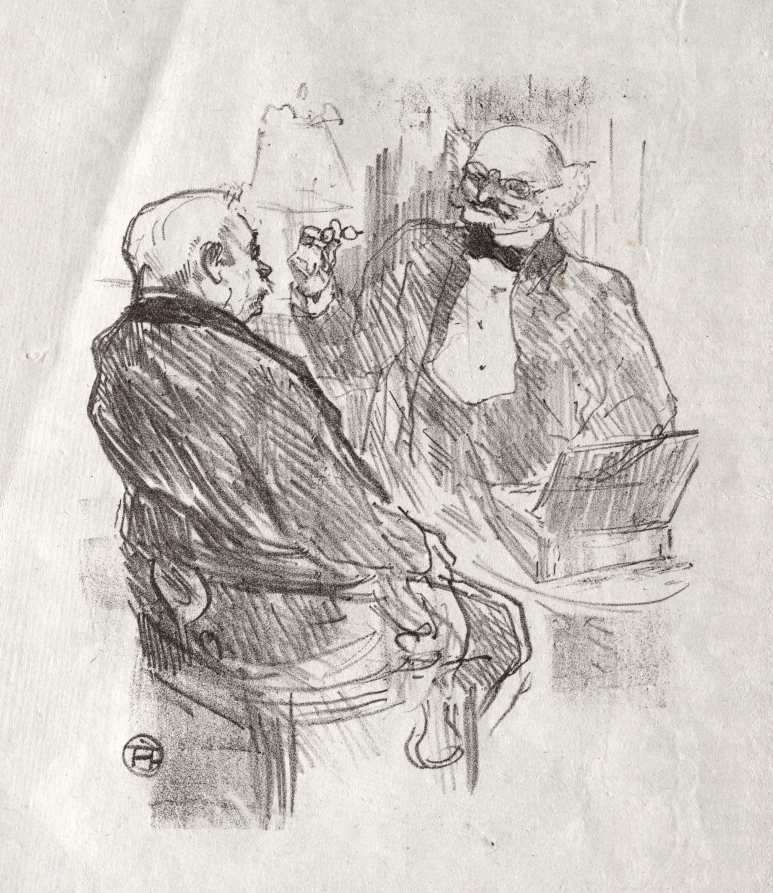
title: Au pied du Sinaï: Georges Clemenceau et L'Oculiste Mayer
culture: France, 19th century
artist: Henri de Toulouse-Lautrec (French, 1864–1901)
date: 1898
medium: lithograph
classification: Print